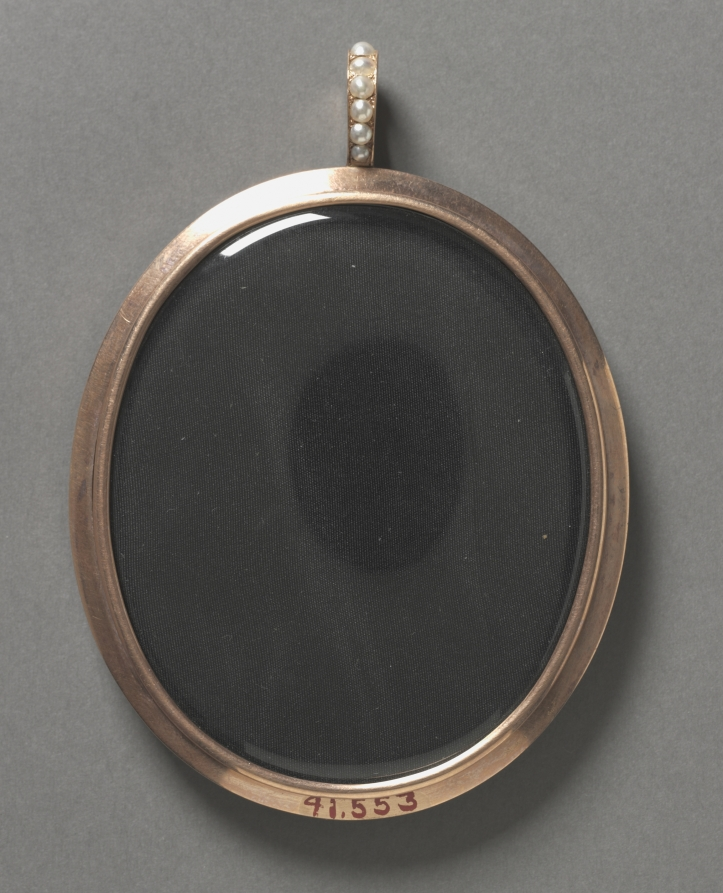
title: Portrait of Mary Frances (Fanny) Swinburne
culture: England, 18th century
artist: Richard Cosway (British, 1742–1821)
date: c. 1786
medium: watercolor on ivory in a gold, enamel, and split pearl frame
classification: Portrait Miniature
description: Mary Frances (Fanny) Swinburne (d. 1828) was the eldest daughter of the travel writer Henry Swinburne. This portrait was painted around 1786, when Richard Cosway was reaching the mature stage of his career and was among the most sought after miniature painters in London. In this work the sitter’s hair is adorned with pearls—a style commonly seen in portraits of the period. She wears an earring in her right ear. Her bright blue eyes, rosy cheeks, and red lips are accentuated by her mass of curled, powdered hair and her pale skin and gown. This work is a classic example of Cosway’s elegant female portraits, exhibiting the nearly monochromatic palette and free style that would be so decisively rejected in the next century by such artists as Andrew Robertson (1777–1845) and William Charles Ross (1794–1860). The miniature is placed in a twentieth-century revival period gold and blue enamel frame with graduated split pearls. This ornate type of frame was especially popular among early-twentieth-century collectors who felt that it suited the grandeur of miniatures by Cosway and his circle, the female portraits of which were so often composed of the pale tones of gauzy dresses, blue skies, and pearl-ornamented hair.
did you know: Richard Cosway painted Mary Frances’s parents, Henry and Martha, in the same year he painted this.